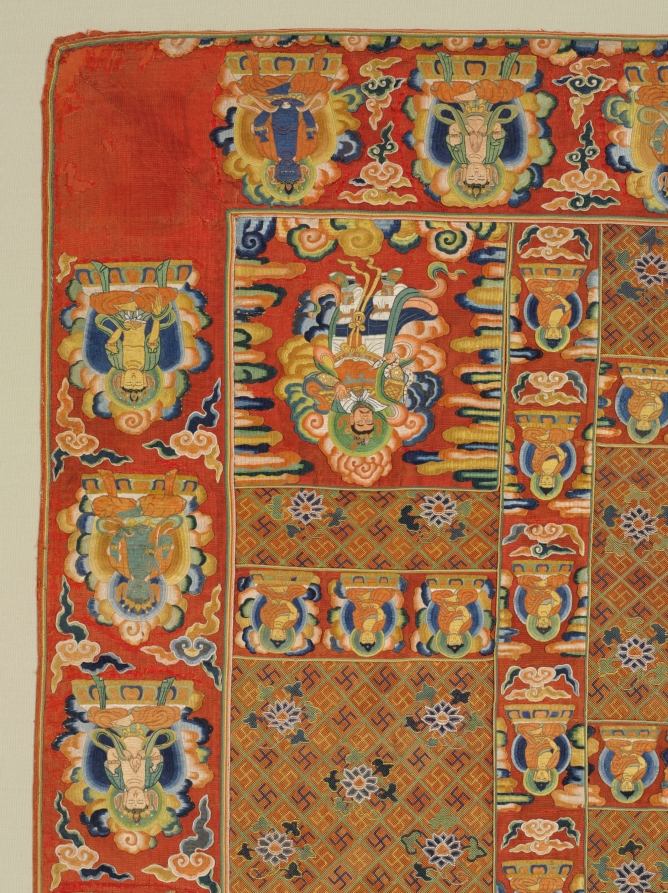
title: Buddhist Priest's Ceremonial Robe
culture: China, Ming dynasty (1368–1644)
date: 1400s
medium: silk and gold thread; embroidery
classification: Garment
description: This example of imperial embroidery is one of the earliest surviving Chinese Buddhist robes (kasaya) in the West. Depicting 991 Buddhas, each slightly different, it is constructed out of patches in reference to the legend in which the Buddha's favorite disciple divided a robe he was given into 30 pieces. Patchwork is also a sign of humility. Multiple Buddha images known as “thousand Buddha” designs are seen painted and sculpted on the walls of cave temples in India, Afghanistan, Central Asia, and China, but are rare on garments. The Four Heavenly Kings, guardians of the four directions, occupy the textile’s corners. When draped around the body, the inverted figures in the upper left corner appear right side up. Robes with 25 columns were worn by the highest-ranking clergy on ceremonial occasions.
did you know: The Five Transcendent Buddhas, who symbolize the purity of the five elements, are repeated around the edges.